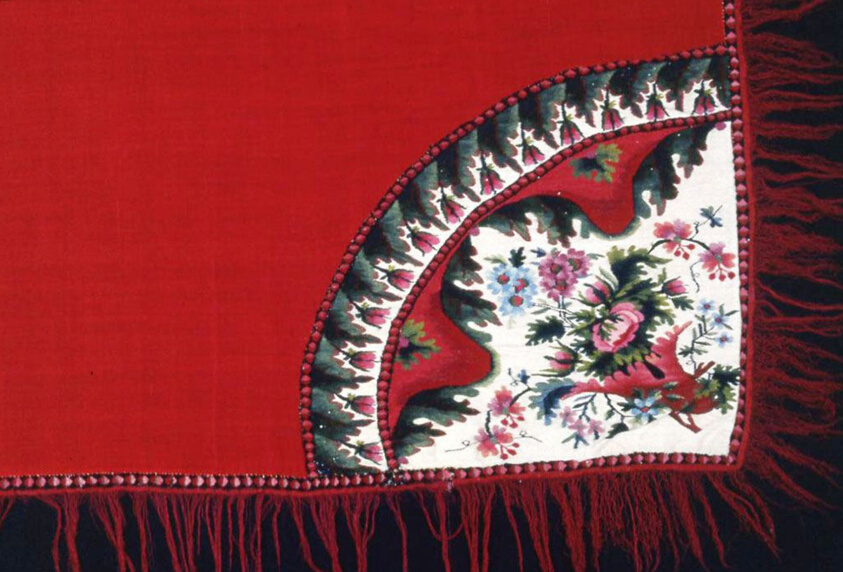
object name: Textile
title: Square Shawl (Turnover)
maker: Russia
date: 1830s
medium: Wool, strips of 2:2 'S' twill weave; borders of dovetailed tapestry weave, reversible; attached plain weave extended ground weft fringe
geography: Russia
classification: textile; weaving; costume accessory; accessories (object genre)